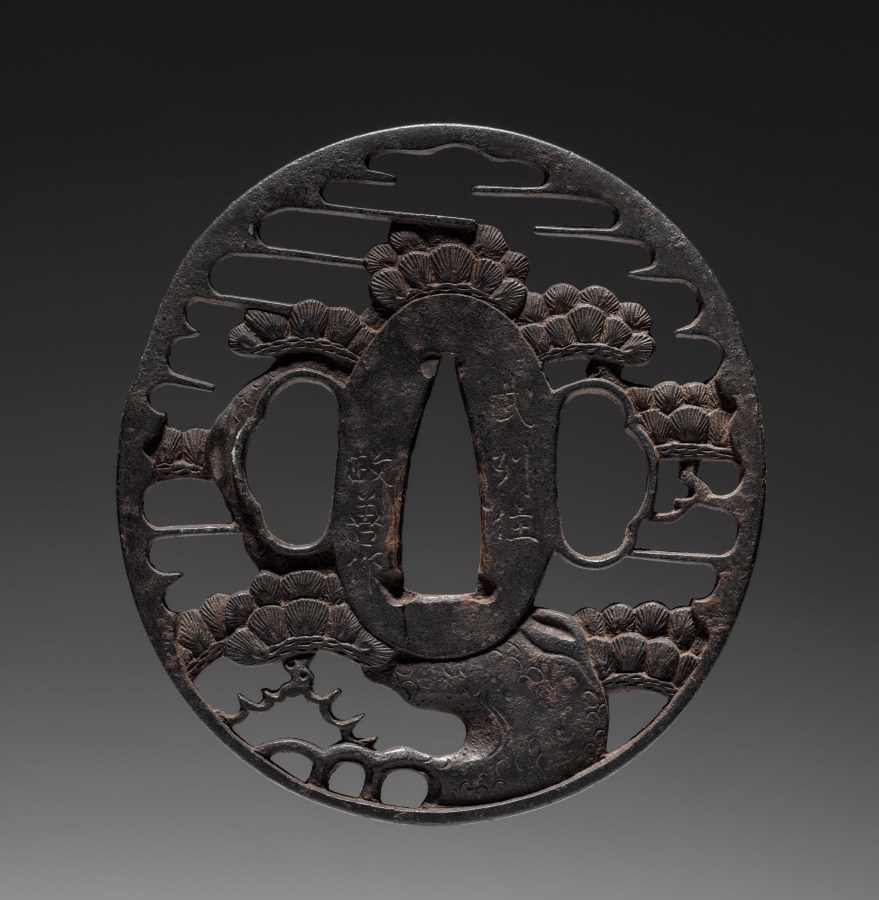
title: Sword Guard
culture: Japan, Edo period (1615–1868)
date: early 1800s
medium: iron (Akasaka type)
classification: Arms and Armor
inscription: signed "Masayoshi, residing in Musashi province, made."